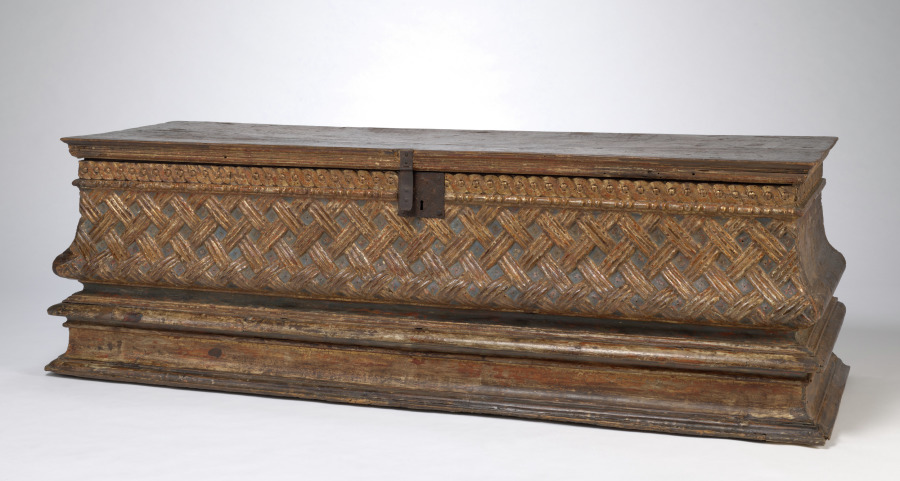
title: Cassone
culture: Italy, early 16th century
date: early 1500s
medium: walnut, painted and gilded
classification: Furniture and woodwork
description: Chests such as this were made in pairs and presented to young women on the occasion of their marriage. They not only provided storage space in the home for clothing and personal effects, but could also be used as a bench to sit on. It was not uncommon for any one room in a Renaissance palace to have several. This chest was in Savoy Castle, near Verzuolo, in the Piedmont region of northern Italy from the 1500s until 1922..